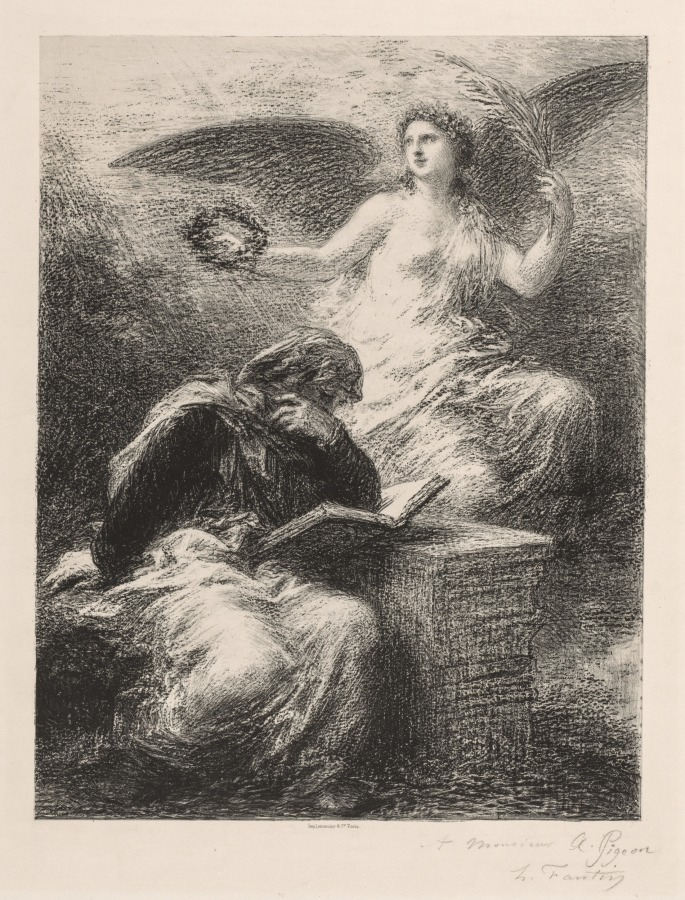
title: Glory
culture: France, 19th century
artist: Henri Fantin-Latour (French, 1836–1904)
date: 1890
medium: lithograph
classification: Print